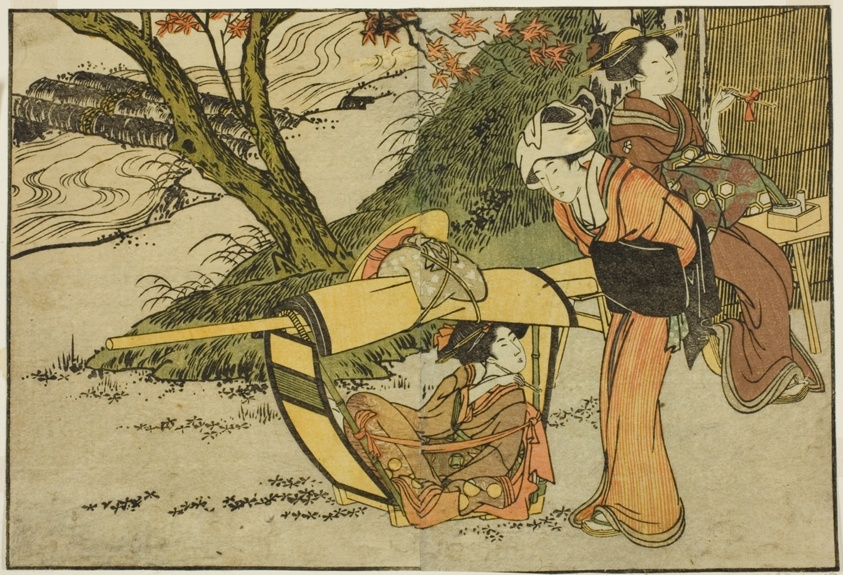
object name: Print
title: Outing to View Maples in Autumn, from the illustrated book "Picture Book: Flowers of the Four Seasons (Ehon shiki no hana)," vol. 2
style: Japanese (culture or style)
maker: Kitagawa Utamaro 喜多川 歌麿; Japanese, 1753 (?)-1806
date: New Year, 1801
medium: Color woodblock print; double-page illustration from book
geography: Japan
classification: woodblock print; print; asian art